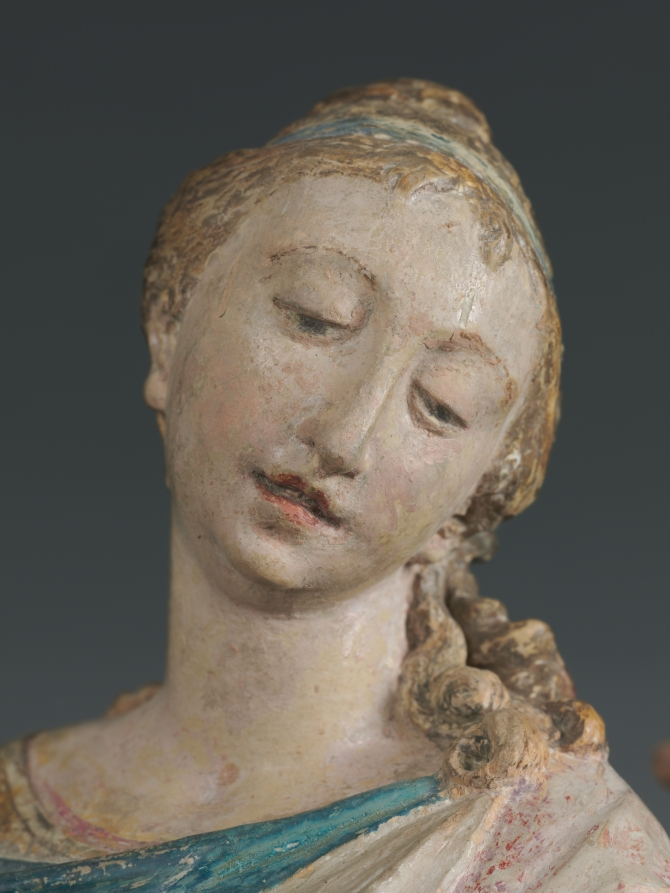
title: The Immaculate Conception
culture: Germany, Munich, 18th century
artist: Ignaz Günther (German, 1725–1775)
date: c. 1770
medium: painted and gilded wood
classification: Sculpture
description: The Christian doctrine of the Immaculate Conception maintains that the Virgin Mary was conceived free from sin, ready to be the pure vessel for Christ’s birth. Depicting such an abstract idea required specific imagery. The moon beneath the Virgin’s feet, for example, comes from the New Testament vision of Saint John the Evangelist (Revelation 12:1) of “a woman clothed with the sun, with the moon under her feet,” while the serpent upon which she treads symbolizes Christ’s triumph over original sin. With his characteristically delicate modeling, elongated proportions, and soft coloring, Ignaz Günther created an archetypal image of innocence on the cusp of womanhood.